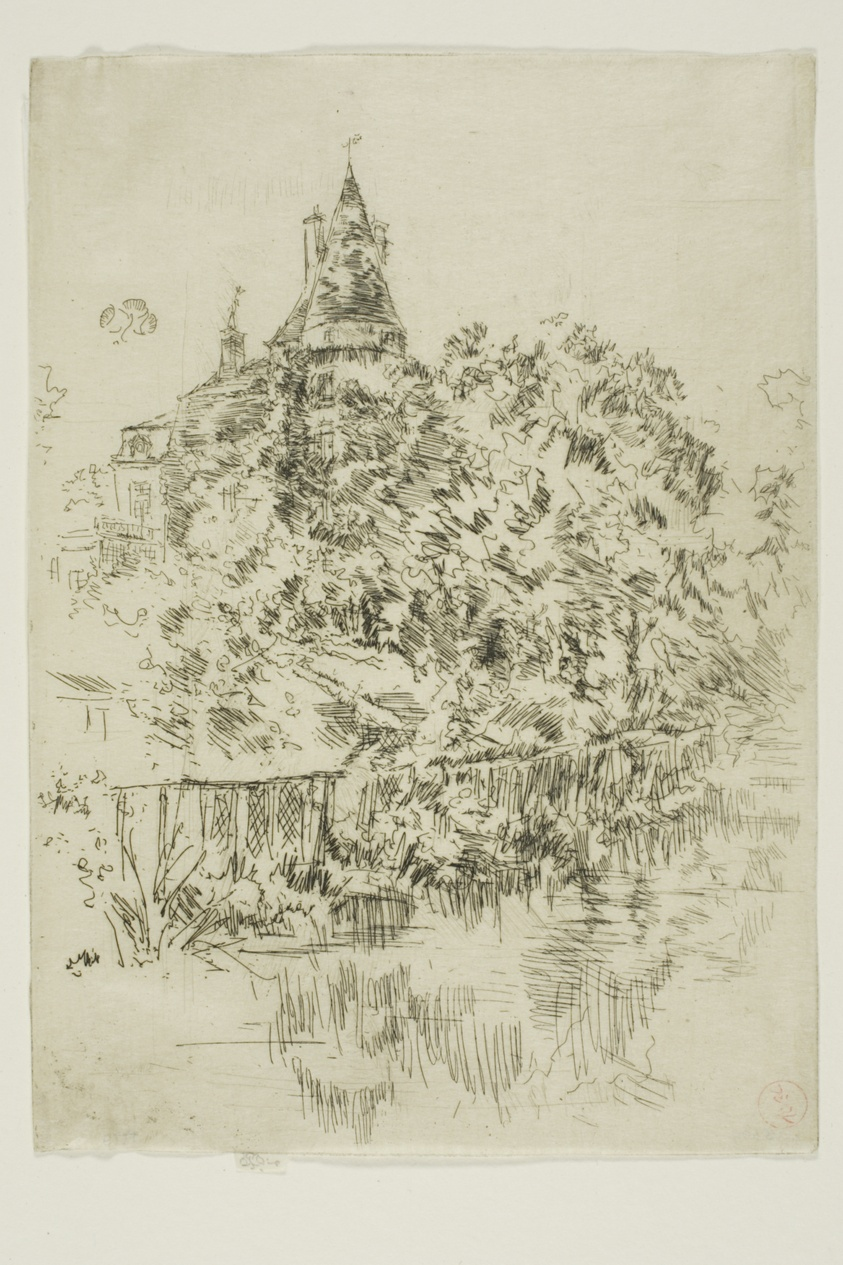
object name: Print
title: Château de Verneuil, Touraine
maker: James McNeill Whistler (American, 1834-1903)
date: 1888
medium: Etching with foul biting in black ink on cream Japanese paper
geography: United States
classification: etching; foul biting; print; prints and drawing; paper